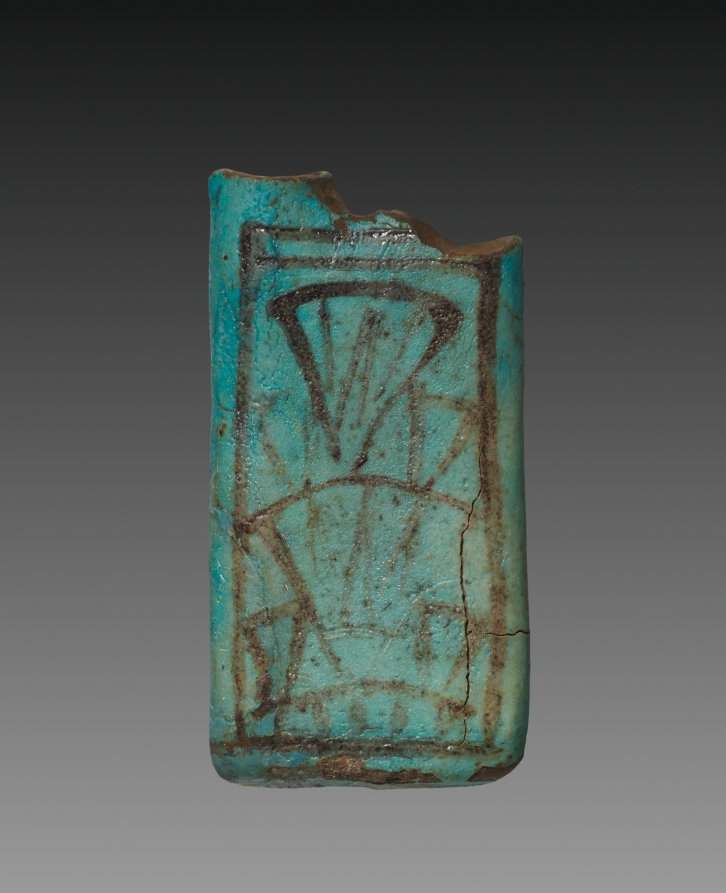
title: Kohl Container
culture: Egypt, New Kingdom (1540–1069 BCE), Dynasty 19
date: 1295–1188 BCE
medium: turquoise faience with black painted decoration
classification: Cosmetic Objects